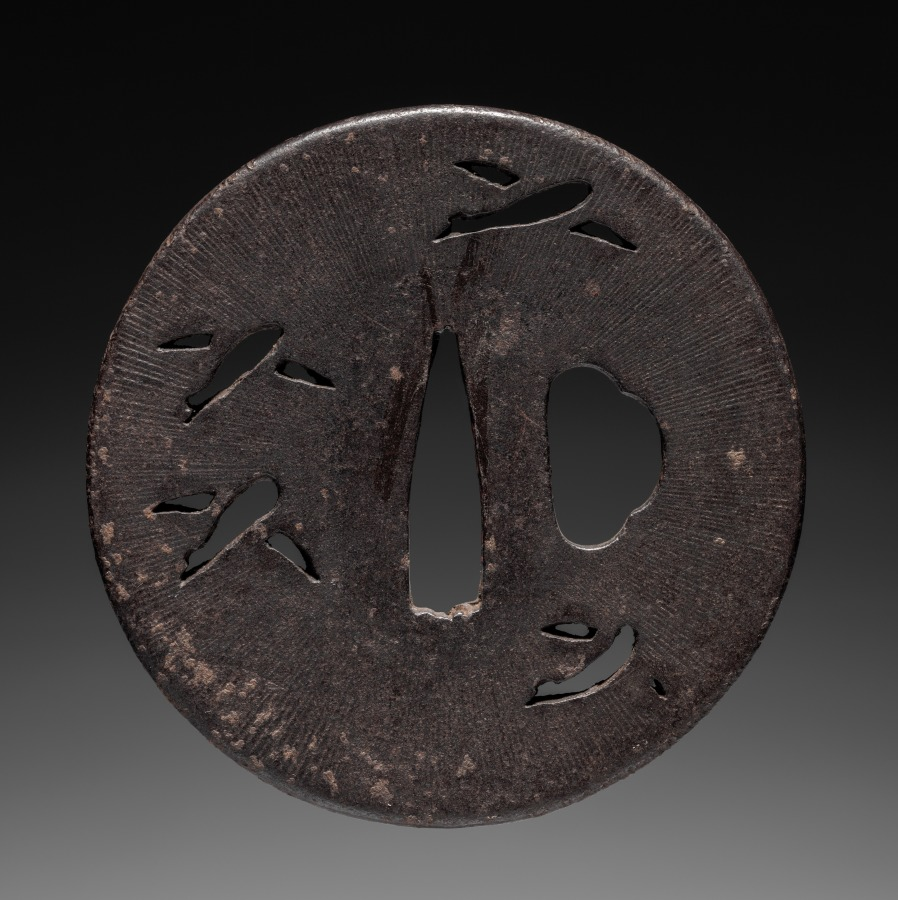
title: Sword Guard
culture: Japan, Edo period (1615–1868)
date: mid-1700s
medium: iron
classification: Arms and Armor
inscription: Signature: Hachido Sakunoshin (Tomohisa), residing at Hagi, Nagato province, made